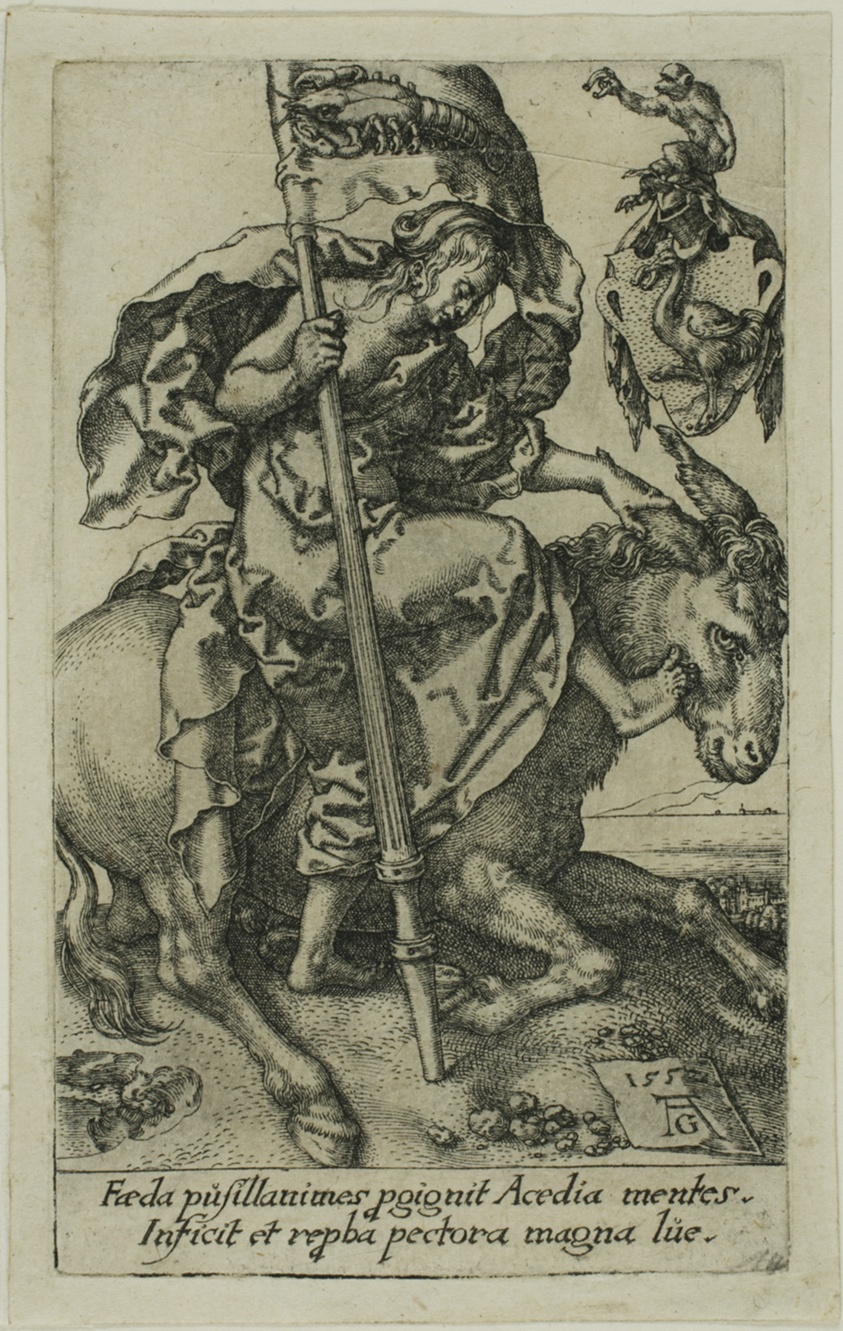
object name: Print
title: Idleness, from the Vices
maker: Heinrich Aldegrever (German, 1502-c.1560)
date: 1552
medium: Engraving in black on ivory laid paper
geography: Germany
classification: engraving; print; prints and drawing